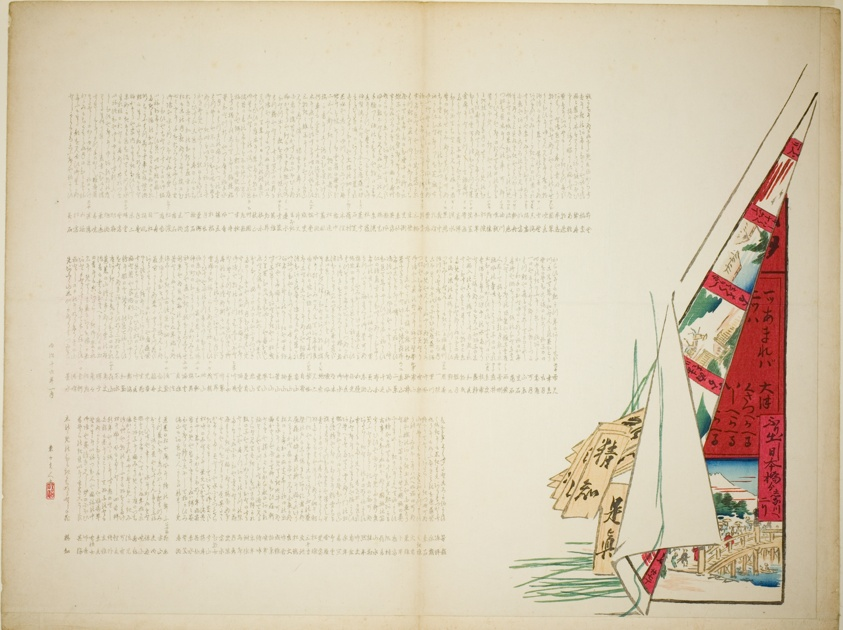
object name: Print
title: Poetic Travel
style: Japanese (culture or style)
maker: Shibata Zeshin (Japanese, 1807-1891)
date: 1st month, 1883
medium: Color woodblock print; surimono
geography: Japan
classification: woodblock print; print; asian art